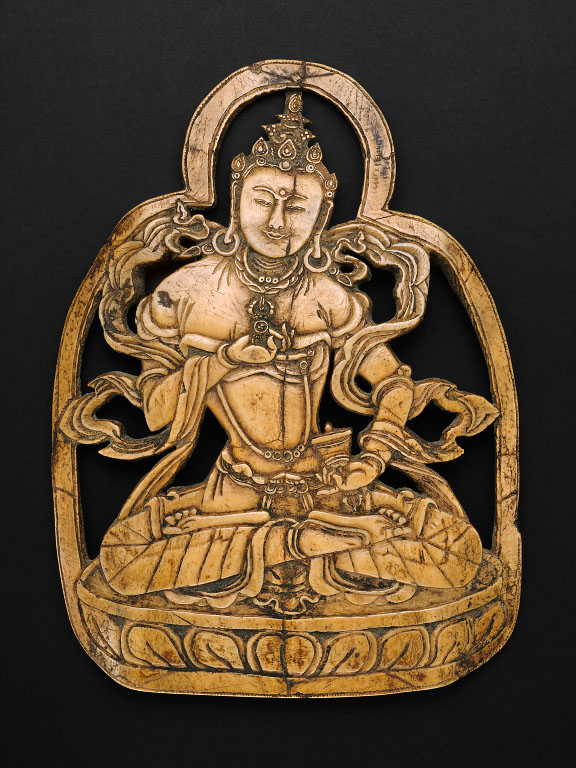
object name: Religious/Ritual Object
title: Plaque of Vajrasattva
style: Himalayan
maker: Tibet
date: 17th century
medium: Carved bone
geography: Tibet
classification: bone; sculpture; asian art; ritual objects